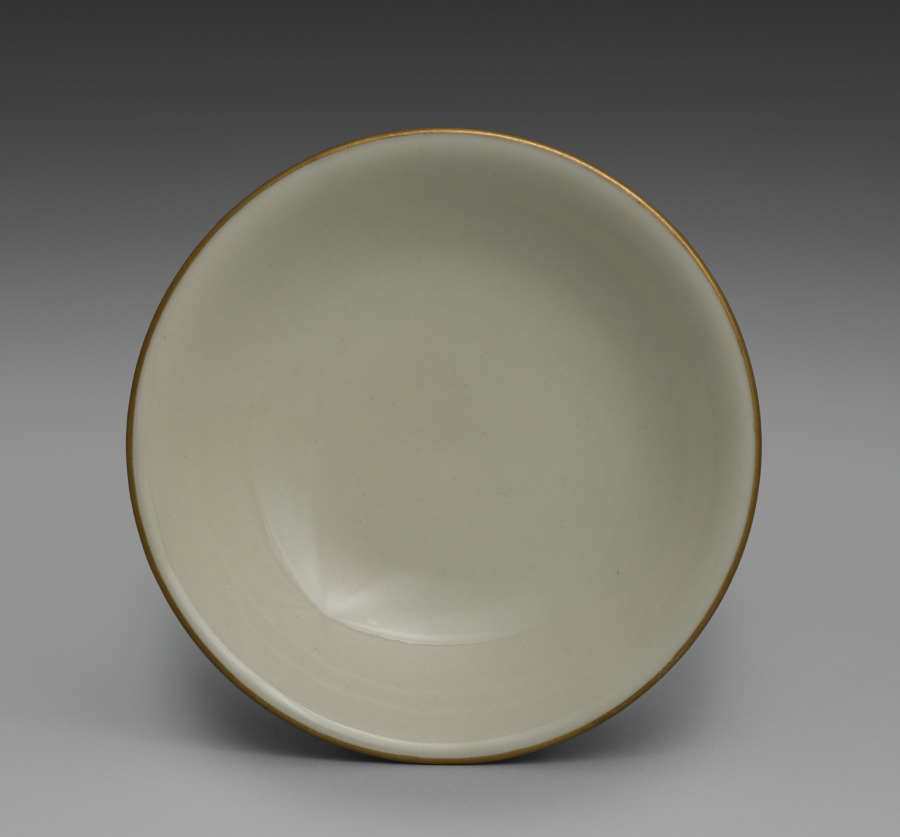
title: Cover for a Bowl from Dining Set with Plum Blossoms and Cracked-Ice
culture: Japan, Meiji period (1868–1912)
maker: Seifū Yohei II (Japanese, 1844–1878)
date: c. 1875–78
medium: Porcelain with molded designs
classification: Ceramic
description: Each item in this set has a delicate low-relief design of flowering plum branches over scattered, intersecting lines meant to resemble the cracked-ice surface of a frozen body of water and is signed on the base in gold pigment. While Yohei II produced many fine works in underglaze blue, like those produced by Kiyomizu Shichibei, he also made works in quite different styles later in his career, from the early 1870 s. In 1873, he was appointed purveyor to the Industrial Center of Kyoto Prefecture, a designation associated with Kyoto’s efforts to reach an international market through the port of Kobe; and from 1875 until his death, he was involved in national-level projects to present Japanese ceramics across the world. It was during this period that Yohei III was apprenticed to Yohei II, and it has been suggested that this set may in fact be an early example of Yohei III’s work, which he signed with his teacher’s name. Decorated with flowers resembling Japanese textile motifs, the set calls to mind the design of Yohei II’s pair of vases with plum blossoms in the Victoria and Albert Museum. Here, the elaborate trees created for a formal public exhibition setting have been translated into the approachable blossoms of the genteel domestic environment. While the designs are consistent across the pieces, each raised flower petal and pistil and each incised line in the ice was done by hand, so the cups, bowls, and dishes are similar yet unique. The bottoms of two boxes once identified the set’s owner, but the information has been deliberately obscured with black ink. However, inscriptions still visible appear to indicate two occasions, once at the end of July 1886 , and once again in June 1916 , when parts of the set were requested from Hokura in Niigata Prefecture. The location corresponds to a neighborhood in the present-day city of Jōetsu. The surname Tsuji 辻 also appears on a paper tag affixed to one of the box cloths. Future research may possibly reveal more about their provenance. A vase by Yohei III in a private collection combines the formal grandeur of the Yohei II vases in the Victoria and Albert Museum with the gentler design of this dining set, placing flowering plum trees against soft, scalloped-edge clouds resembling those in golden screens.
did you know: The dining wares have a creamy white coloration that the four boxes containing them identify as Korean in style.